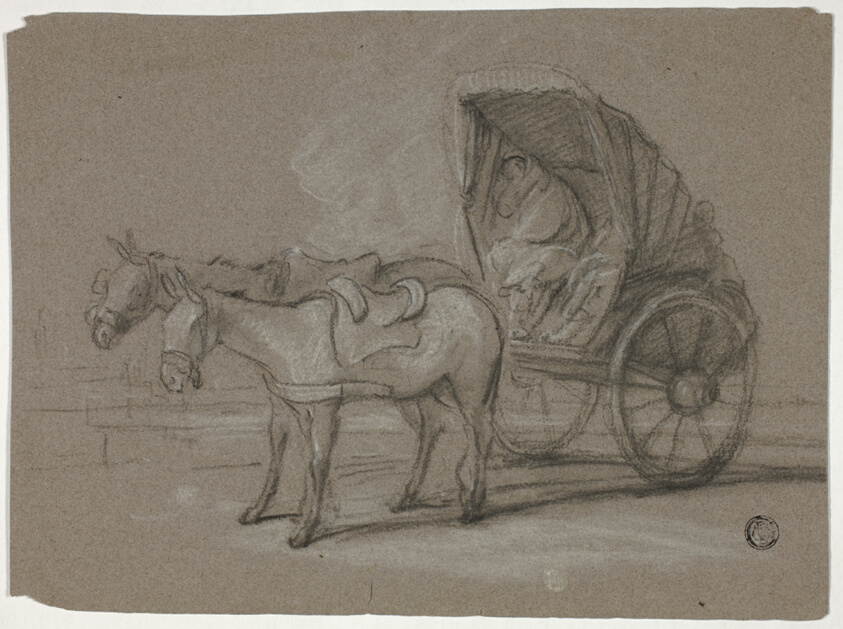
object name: Drawing and Watercolor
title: Huckster Cart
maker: Thomas Barker (English, 1769-1847); or Thomas Jones Barker (English, 1815-1882)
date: c. 1790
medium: Charcoal, with stumping, heightened with white chalk, on dark pink wove paper with blue fibers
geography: England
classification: chalk; paper; drawings (visual works); prints and drawing